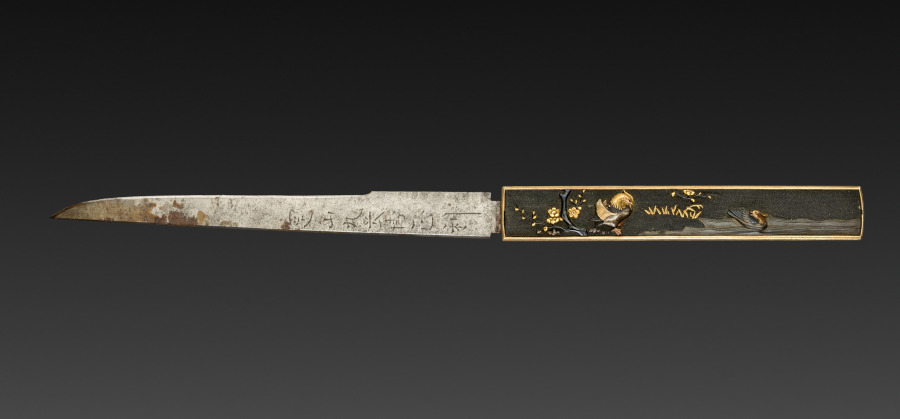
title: Knife with Handle (Kozuka) with Mandarin Ducks in Plum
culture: Japan, Edo period (1615–1868)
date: 1615–1868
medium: metal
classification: Metalwork